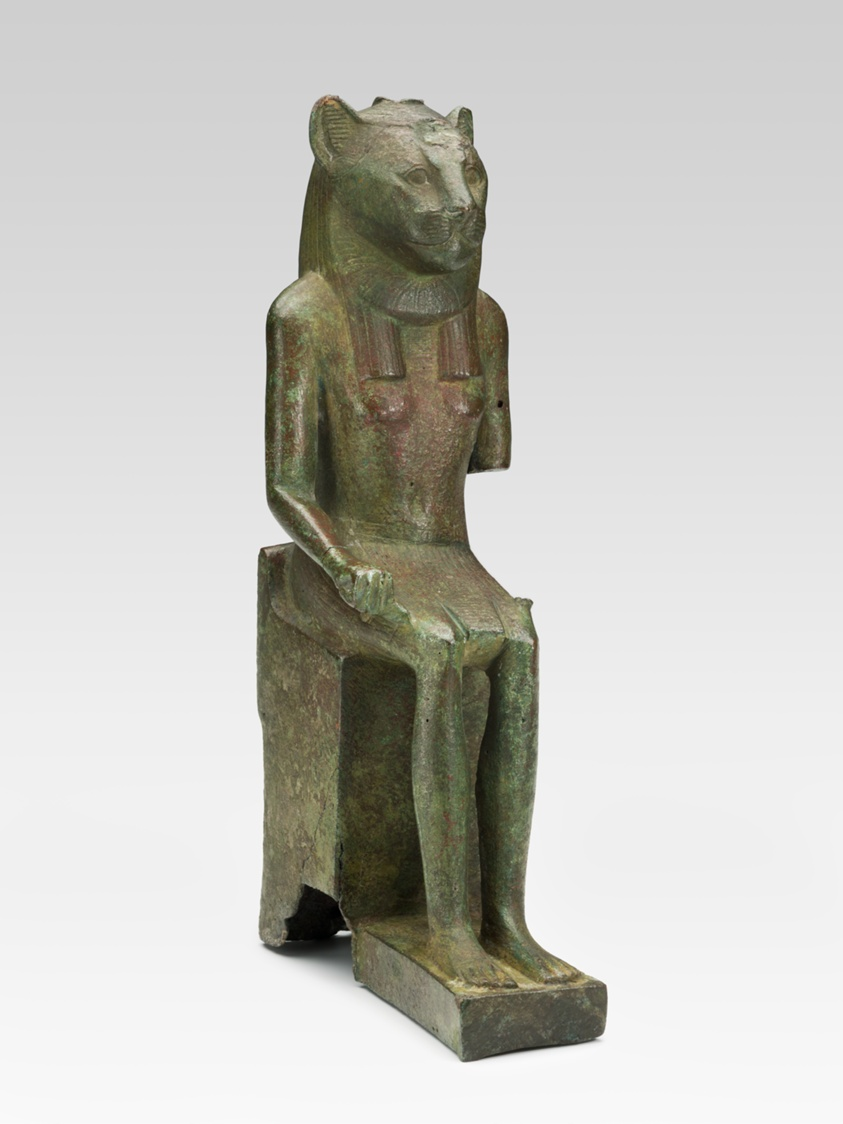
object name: Sculpture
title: Statuette of a Lion-headed God, probably Horus of Buto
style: late period (egyptian), ptolemaic, greco-roman (egyptian), ancient, egyptian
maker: Egyptian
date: Late Period (664–332 BCE)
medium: Copper alloy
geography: Egypt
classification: statuette; bronze; metal; sculpture; ancient art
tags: gods (deities), lions